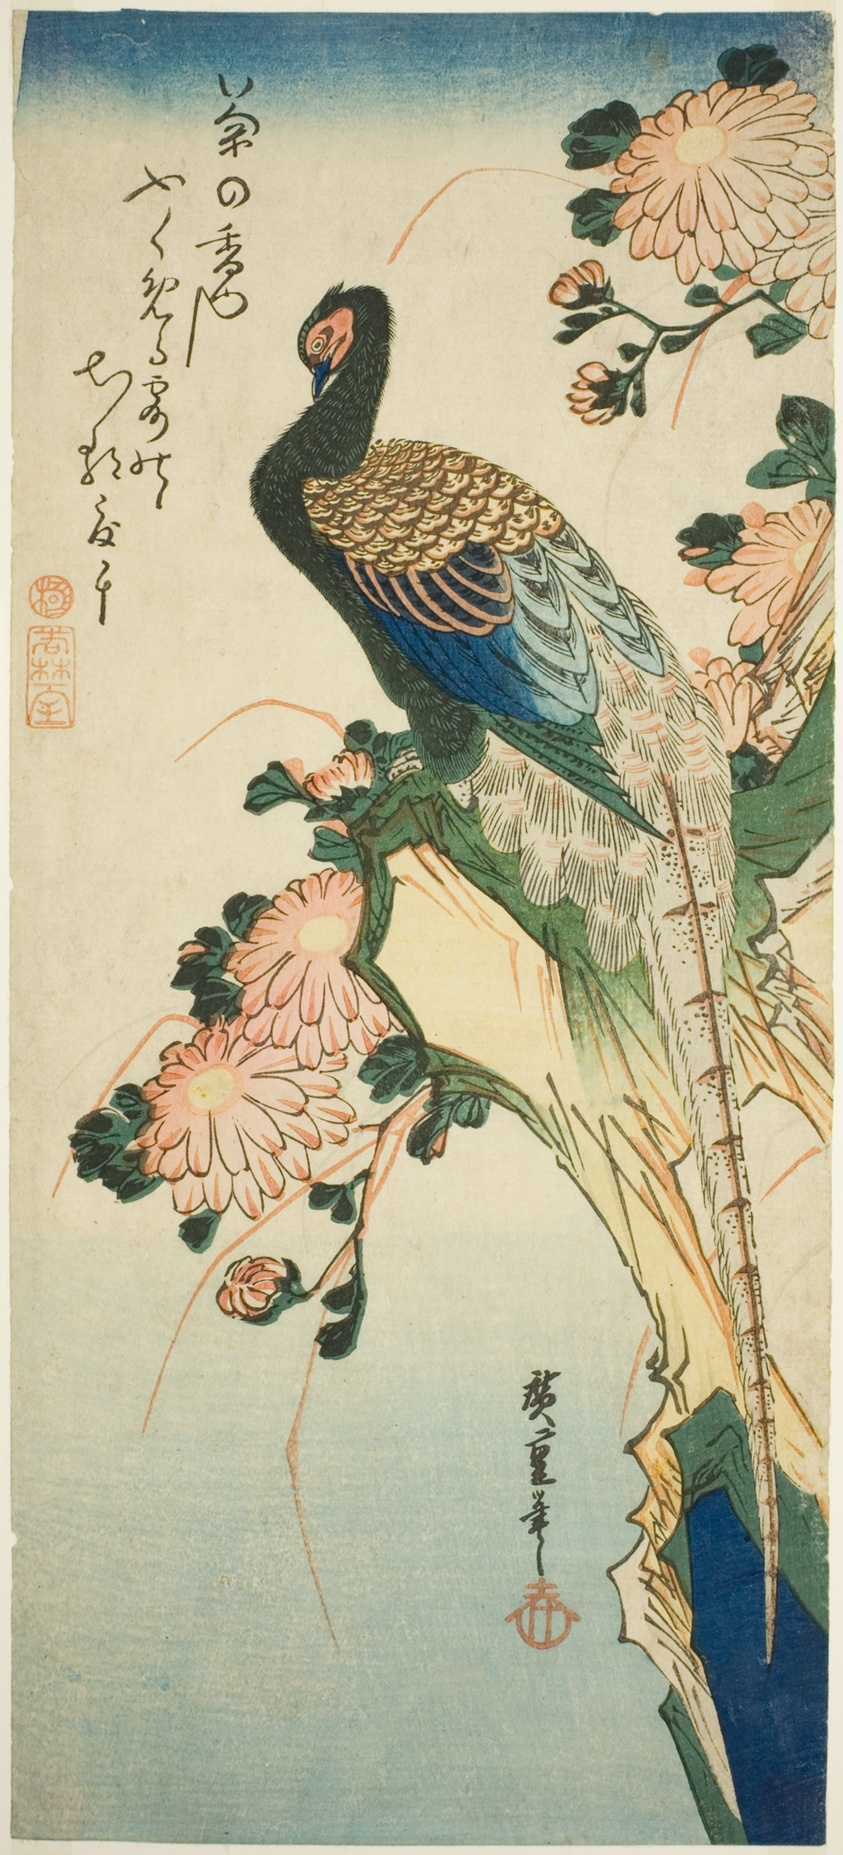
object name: Print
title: Pheasant and chrysanthemums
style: Japanese (culture or style)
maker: Utagawa Hiroshige 歌川 広重; Japanese, 1797-1858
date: 1830s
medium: Color woodblock print; otanzaku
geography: Japan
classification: woodblock print; print; asian art